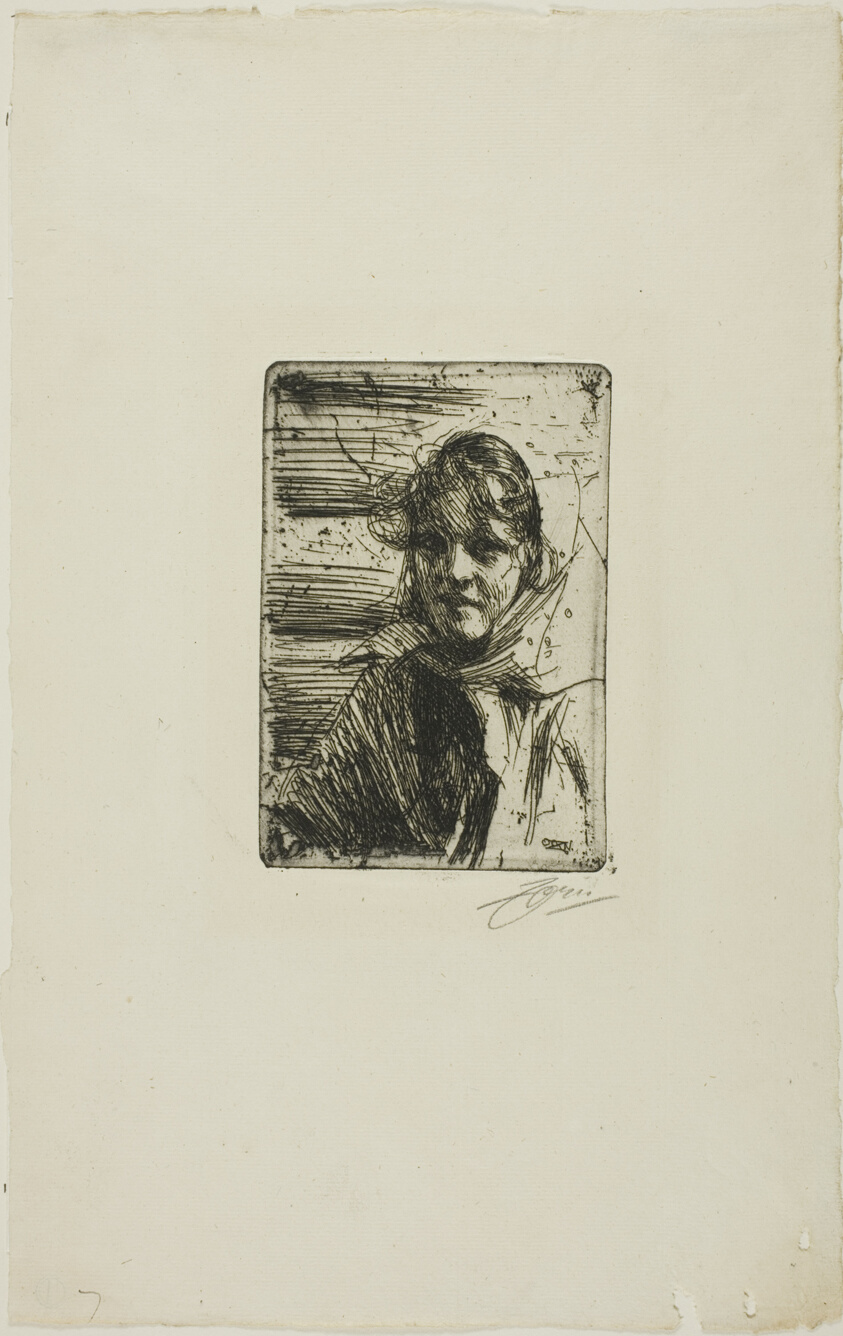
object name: Print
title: Kol Margit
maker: Anders Zorn (Swedish, 1860-1920)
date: 1900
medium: Etching on ivory laid paper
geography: Sweden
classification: etching; print; prints and drawing